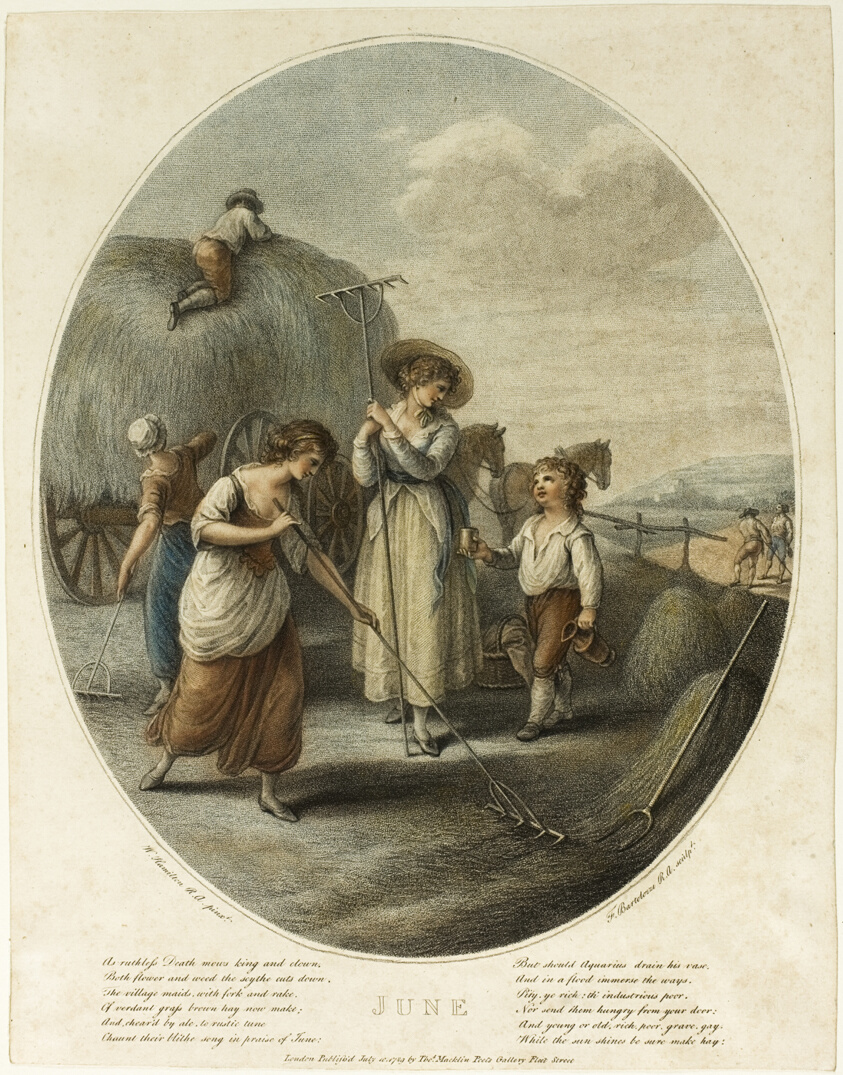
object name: Print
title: June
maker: Francesco Bartolozzi (Italian, 1727-1815); after William Hamilton (English, 1751-1801); published by John and Josiah Boydell (English, 18th century)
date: July 10, 1789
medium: Color stipple engraving on paper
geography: Italy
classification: engraving; print; prints and drawing